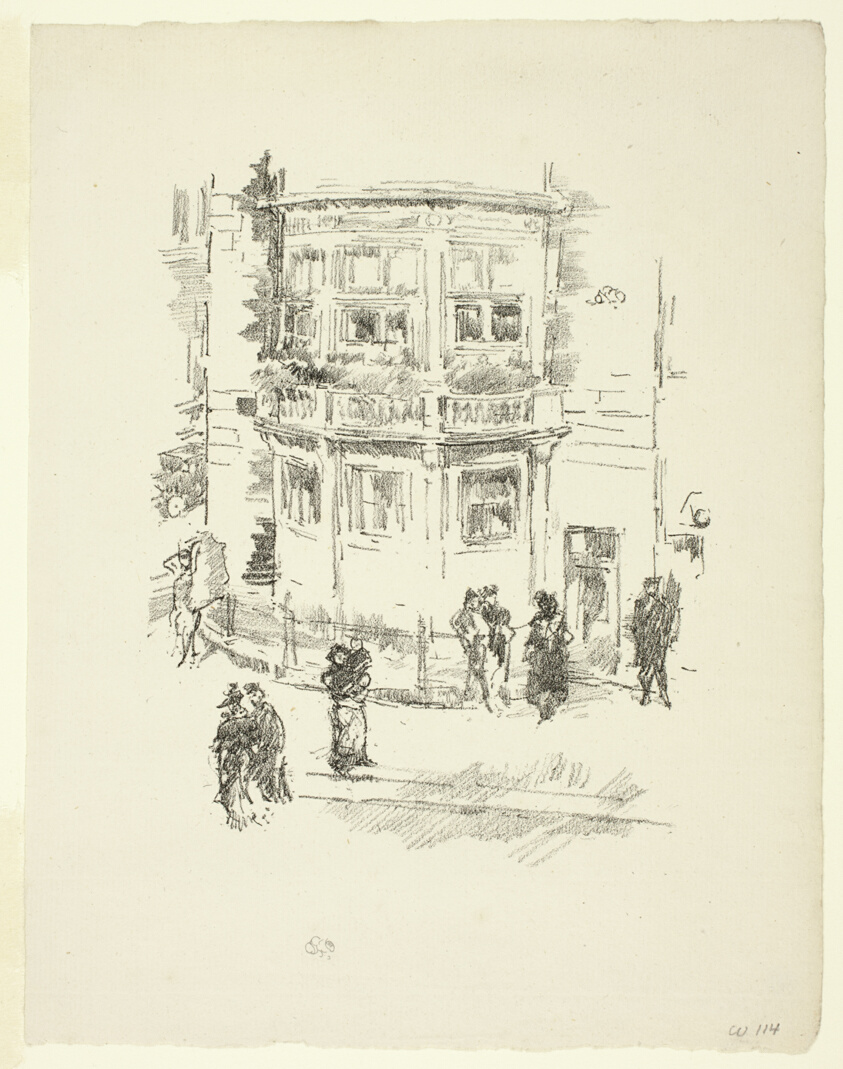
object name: Print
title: The Manager's Window, Gaiety Theatre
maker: James McNeill Whistler (American, 1834-1903)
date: 1896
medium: Transfer lithograph in black on ivory laid paper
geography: United States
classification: transfer lithograph; lithograph; print; prints and drawing; paper